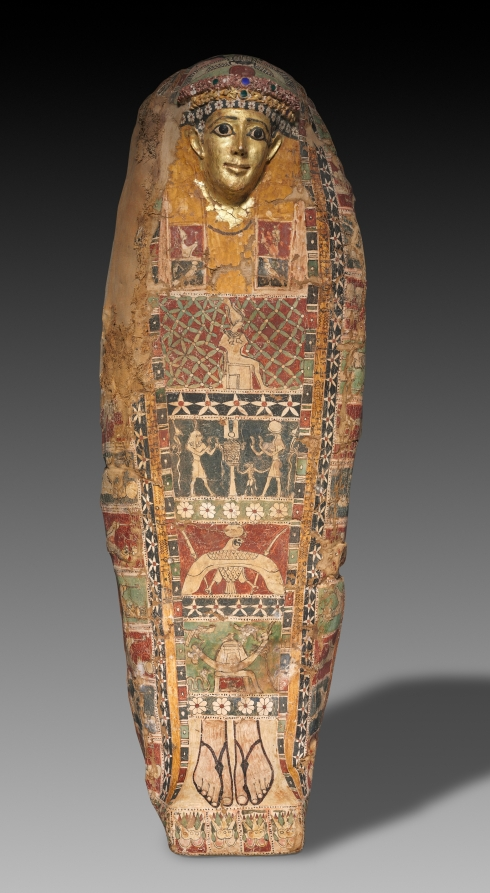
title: Cartonnage Mummy Case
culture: Egypt, Greco-Roman period (332 BCE–395 CE), Ptolemaic dynasty (305–30 BCE)–Roman empire (30 BCE–395 CE)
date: c. 50 BCE–50 CE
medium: cartonnage, painted and gilded, with glass inlays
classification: Funerary Equipment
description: This mummy case is made of cartonnage, a material similar to papier-mâché, but using layers of linen rather than paper. Cartonnage mummy cases such as these are contemporary with funerary portraits painted on wood or linen, although they present a very different appearance. The face, modeled in plaster, is bland and idealized, although the effect of the gilding and glass inlays is quite dazzling. The body is painted with traditional, age-old funerary motifs: the god Osiris, seated and mummiform; the fetish of Abydos, holy city of Osiris, flanked by standing deities (Thoth and Shu); a Horus falcon with outspread wings, and the bark of Sokar. Below these are the sandaled feet of the deceased. On the sides are rows of seated deities. On the top of the head are a winged scarab beetle flanked by Anubis jackals. On the foot are painted the soles of the deceased’s sandals, flanked by scorpions for protection.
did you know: This coffin is smaller and later in date than the other coffins in this gallery. It is made of cartonnage, which used layers of linen to create a material similar to papier-mâché. The painted portrait head displays the influence of Roman portraiture at this time and incorporates both gilding and glass inlays. Despite the fragile materials, this mummy case survived due to the very dry desert climate in which it was found.